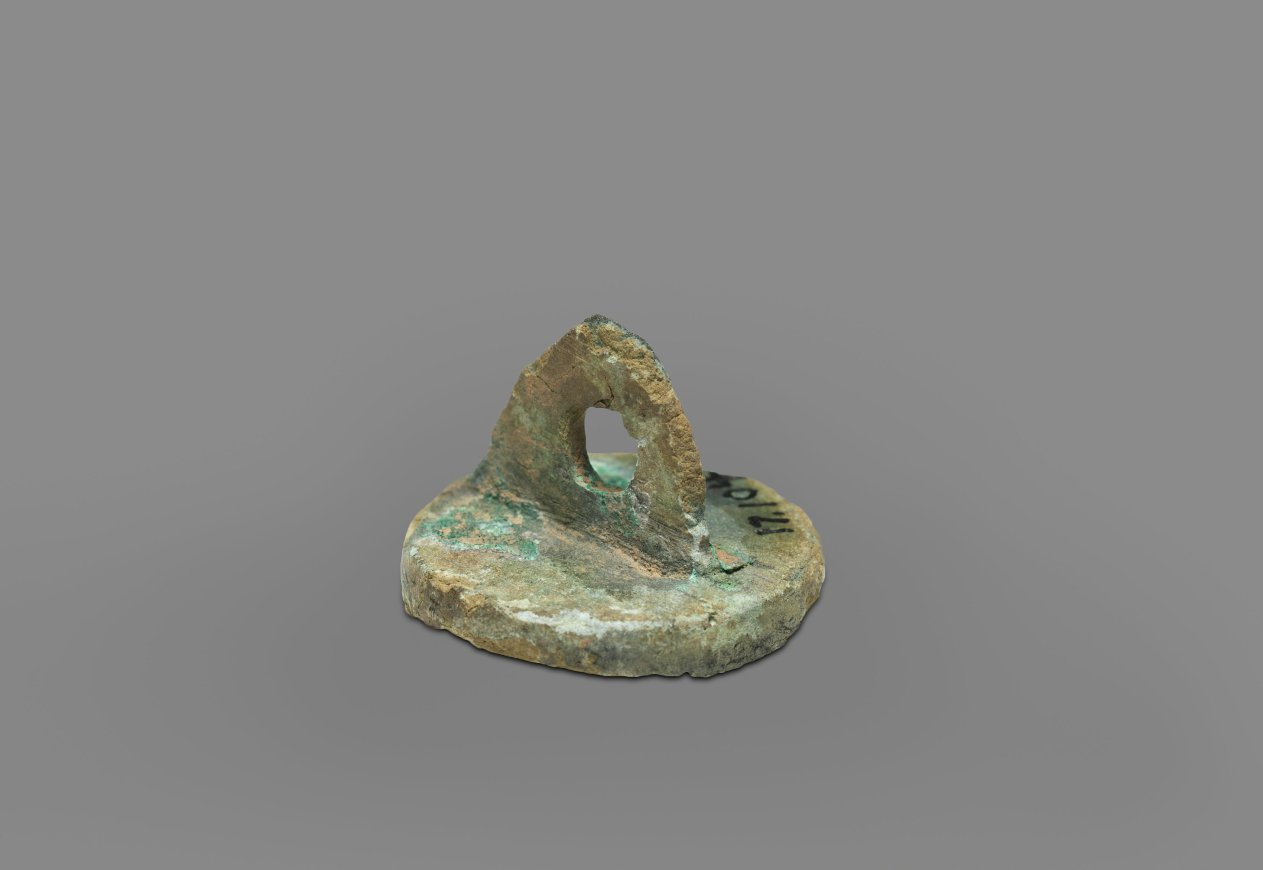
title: Seal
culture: Korea, Goryeo dynasty (918–1392)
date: 918–1392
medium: bronze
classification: Metalwork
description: A large quantity of bronze seals were excavated from tombs of the Goryeo dynasty. This bronze seal appears to have been designed for stamping the sealed envelopes of letters. However, the remains of red cinnabar seal paste is not very visible; it may not have been used much before it was buried in the tomb.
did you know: A large quantity of bronze seals excavated from tombs of the Goryeo dynasty is closely related to the development of metallurgy in 13th-century Korea that allowed the transition from wood type to movable metal type printing.